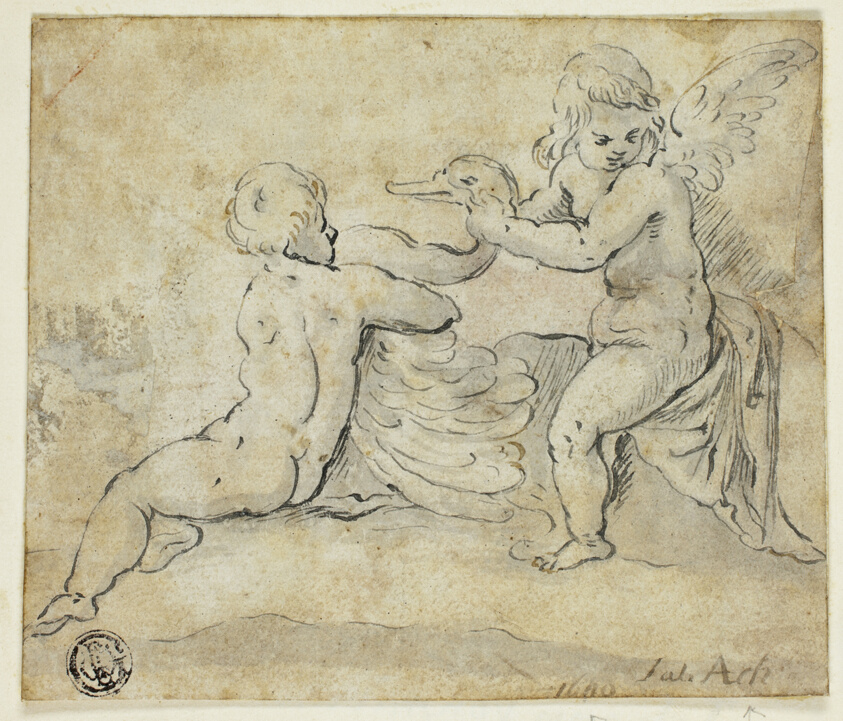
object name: Drawing and Watercolor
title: Putti Holding Swan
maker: Possibly Johann von Aachen; German, 1552-1616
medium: Pen and gray ink, with brush and gray wash, on cream laid paper, laid down on ivory laid card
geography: Germany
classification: pen and ink drawings; drawings (visual works); prints and drawing